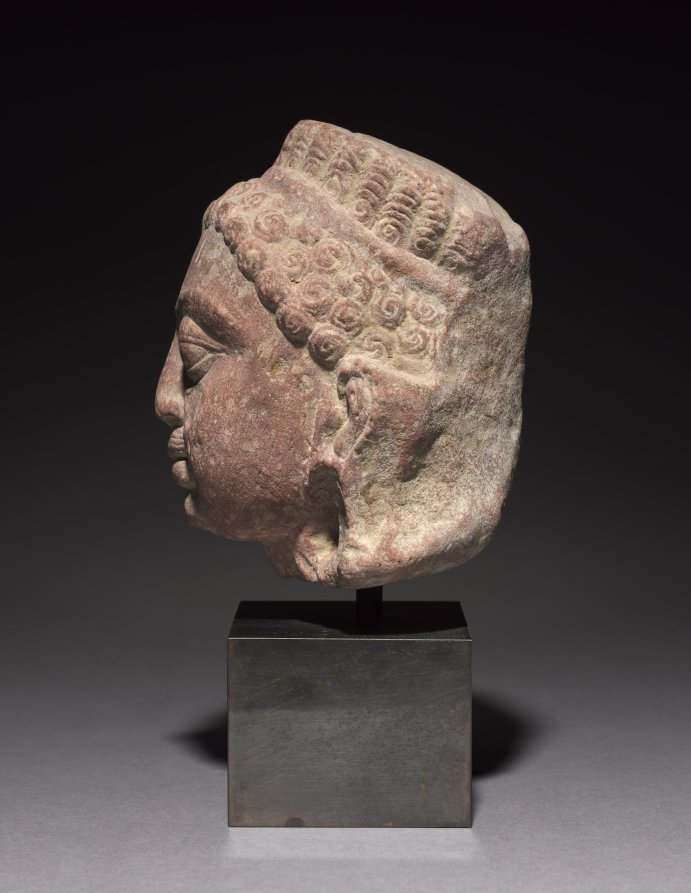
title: Head of Kubera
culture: Northern India, Mathura, Kushan period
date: 200s CE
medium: spotted red sandstone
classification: Sculpture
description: Kubera is the god of wealth, and he is most often depicted with a moustache during this period.